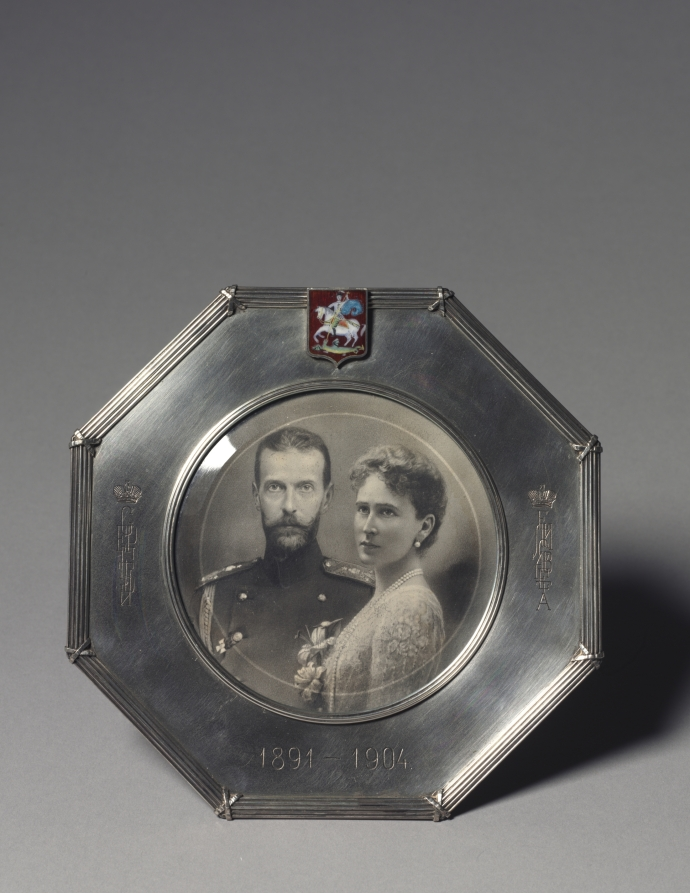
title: Octogonal Frame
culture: Russia, St. Petersburg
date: 1903–1904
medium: silver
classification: Miscellaneous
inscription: inscribed on front: Sergei in Cyrillic with an imperial crown; Elisabeta in Cyrillic with an imperial crown; 1891-1904. In ink on back, C. 15256.